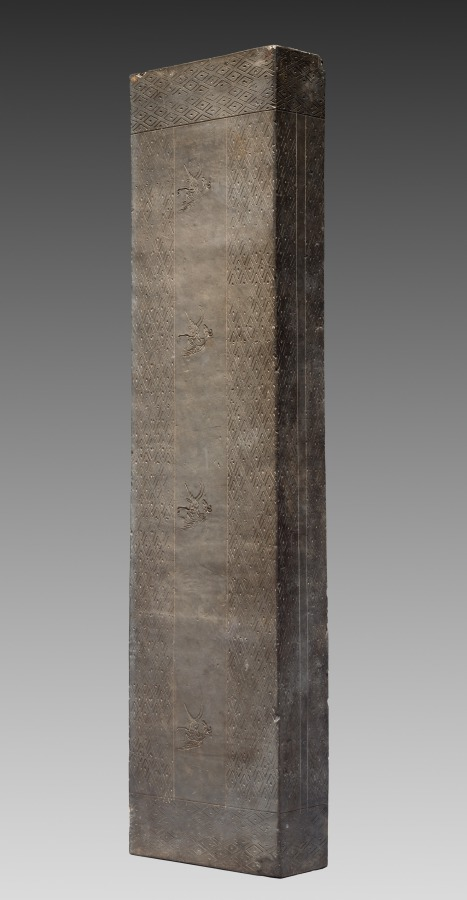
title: Tomb Tile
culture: China, Henan province, Jincun, Eastern Zhou dynasty (770–256 BCE)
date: 771–256 BCE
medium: earthenware with stamped decoration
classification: Ceramic